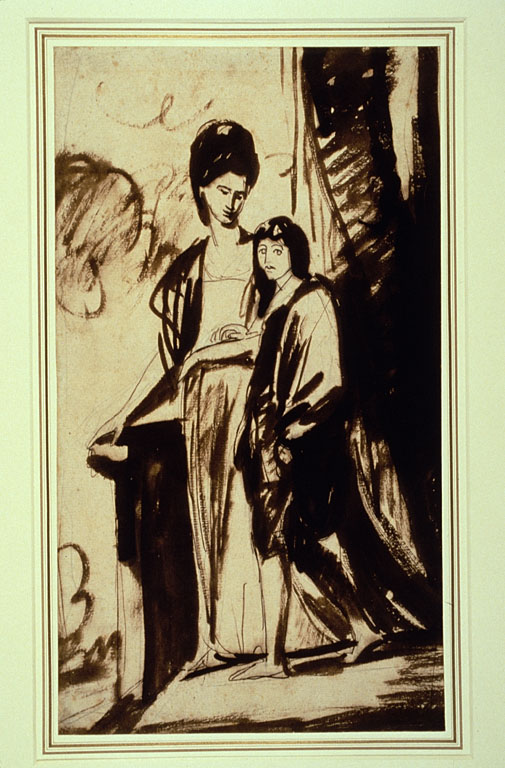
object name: Drawing and Watercolor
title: Portrait of a Mother and Her Son (Probably Jane, Duchess of Gordon, and her Son George, First Marquess of Huntley)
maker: George Romney (English, 1734-1802)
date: c. 1778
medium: Pen and brown ink over graphite on buff laid paper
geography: England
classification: pen and ink drawings; drawings (visual works); prints and drawing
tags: mothers, sons